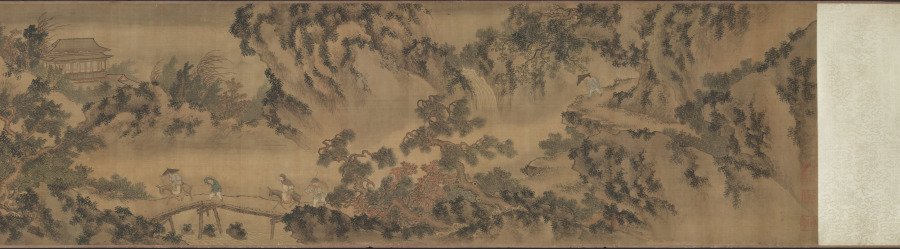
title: Returning to the Village in a Rainstorm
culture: China, Ming dynasty (1368–1644)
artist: Xie Shichen (Chinese, 1487–after 1567)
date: 1530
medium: Handscroll; ink and light color on silk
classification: Painting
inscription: 風雨歸村圖 嘉靖庚寅秋日樗仙謝時臣. [印] 謝時臣印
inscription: 3 additional seals unidentified.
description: This scroll depicts a wind- and rainswept landscape with figures in the countryside struggling against a late summer monsoon rainstorm. Such weather was familiar to residents of the lower Yangzi delta. Xie Shichen spent most of his life in the Suzhou area. Details of his career are scant, but his surviving works suggest that he made his living as a professional painter. This painting conveys drama and anecdotal observations, characteristic of Zhe school paintings, such as the one by Lü Wenying, CMA 1970.76.